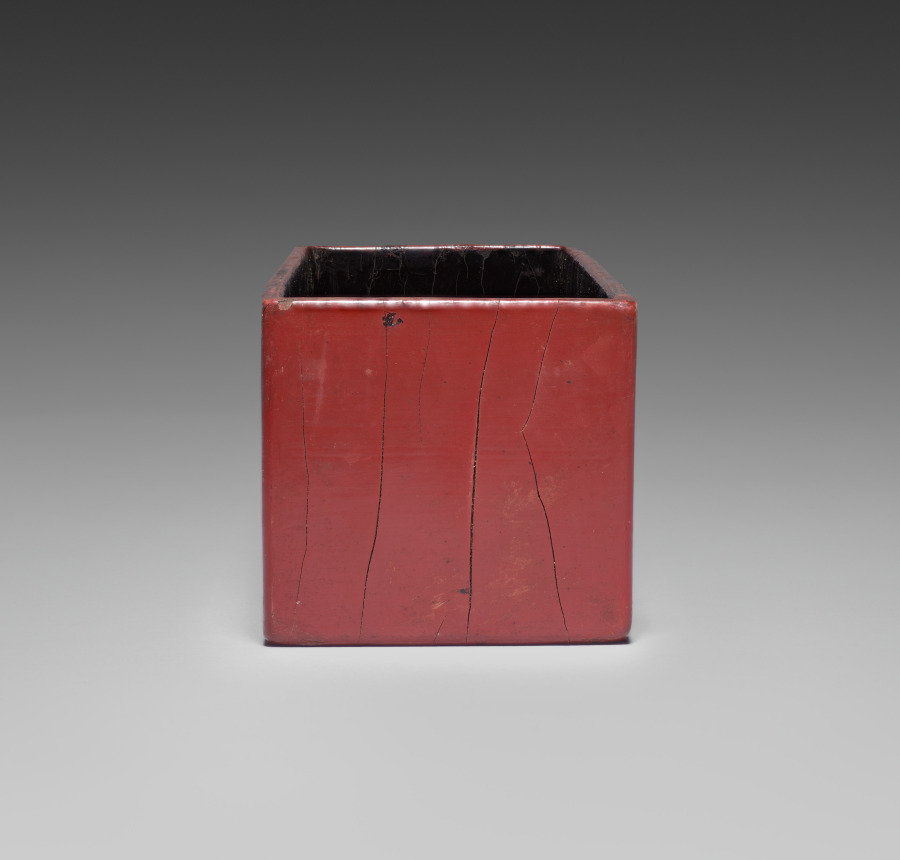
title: Drawer for a Tihong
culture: China, Ming dynasty (1368-1644), Wanli reign (1572-1620)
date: 1585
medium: carved cinnabar lacquer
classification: Lacquer